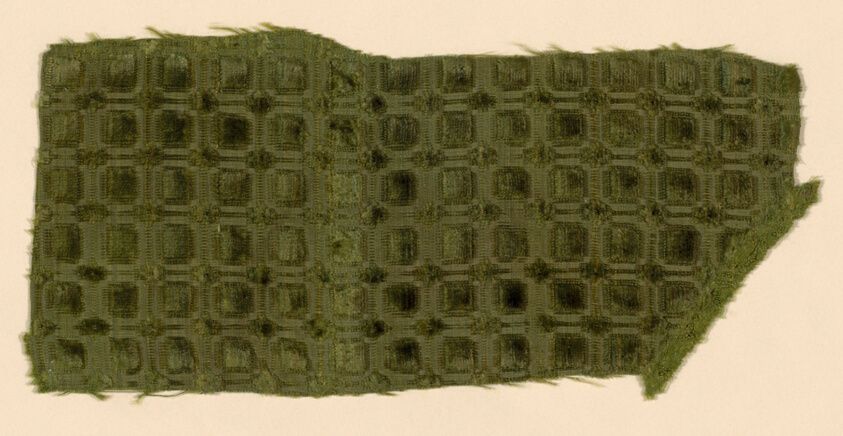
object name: Textile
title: Fragment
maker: Italy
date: 1575/1600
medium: Silk, plain weave with supplementary pile warps forming cut and uncut voided velvet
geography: Italy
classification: textile; weaving - velvet; weaving